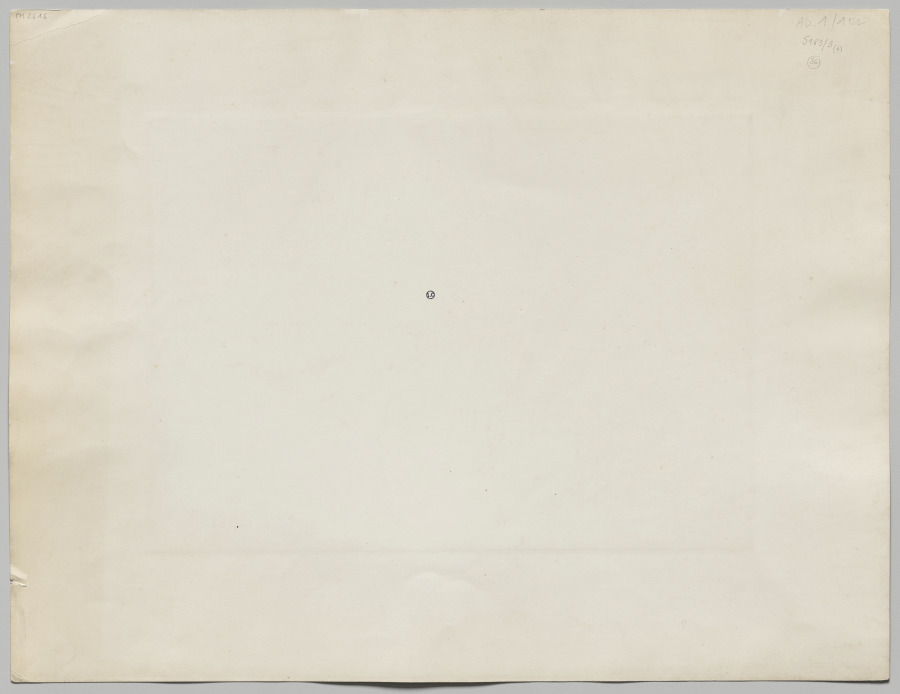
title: Chemin de fer de Toulouse à Bayonne. Pont de l'Aran (en trois arches de 17m d'ouverture chacune). Situation des travaux au 21 juillet 1861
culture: France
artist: Édouard Baldus (French, 1813–1889)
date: 1861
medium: albumen print from collodion negative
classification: Photograph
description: Edouard Baldus, the most important French 19th-century architectural photographer, here reveals the process of constructing a bridge. In 1861 he was commissioned by the railway company that owned the principal route across southwest France to document the region’s landscape, towns, monuments, and railroad structures such as bridges and viaducts.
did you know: The rise of photography coincided with the creation of the railroads and the modernization of France.